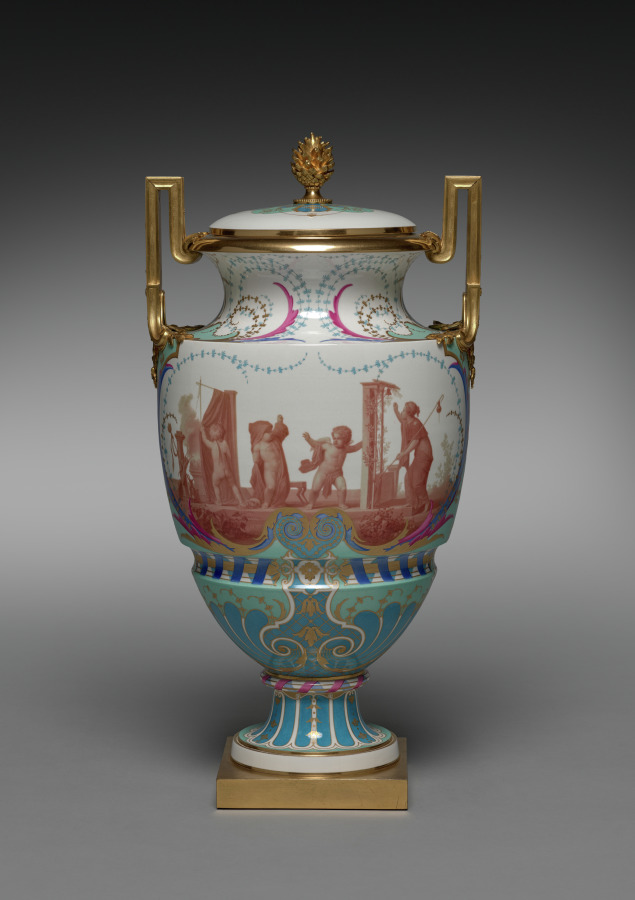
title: Vase Feuille d'Eau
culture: France, Sèvres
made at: Sèvres Porcelain Factory (French, est. 1756)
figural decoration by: Paul Marie Roussel (French, 1804–1877)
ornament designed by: Emile Renard (French)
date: 1858–62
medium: porcelain with gilt bronze mounts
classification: Ceramic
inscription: figural paintings signed obverse and reverse: "PMROUSSEL INV & PIN"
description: Feuille d'Eau means "waterleaf" and refers to the name given to the shape of this vase at the Sèvres factory. In English, waterleaf is the common name for a plant with bell-shaped flowers. The term is also applied to a stylized plant motif used in Graeco-Roman ornament. This vase was exhibited by the Sèvres firm at the International Exhibition held in London in 1862.